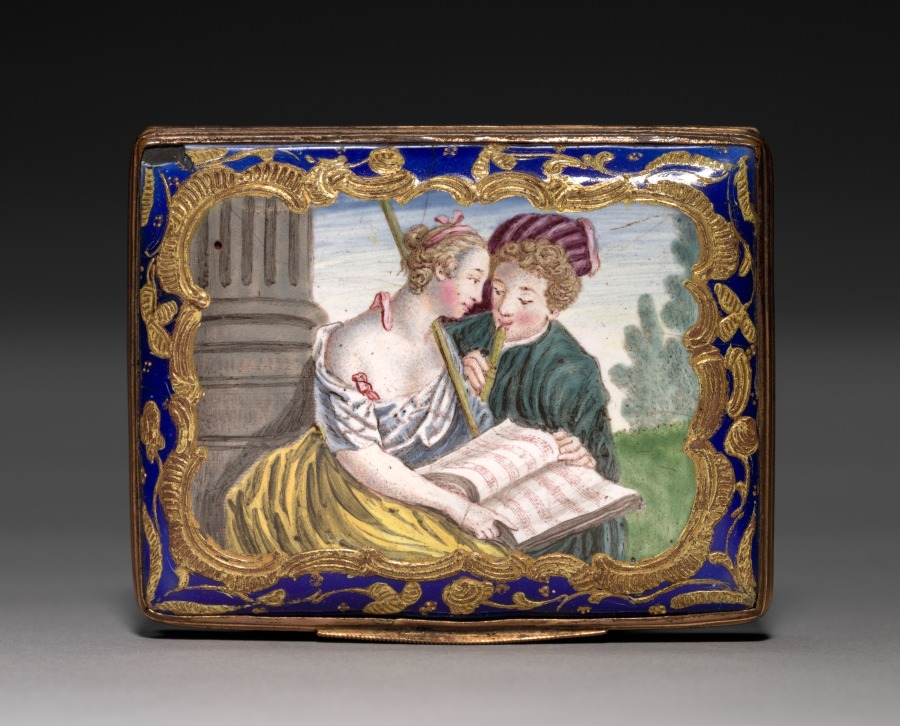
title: Snuff Box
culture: England, South Staffordshire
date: c. 1770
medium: enamel on copper, gilt metal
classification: Miscellaneous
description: Luxurious personal objects, like this snuff box, were an essential part of a privileged wardrobe during the 1700s and early 1800s, emphasizing their owner’s refinement and wealth. Their glittering surfaces, however, disguised a system based on the labor and suffering of enslaved or indentured people, whether in gold or stone mines, tobacco farms, or shops where these goods were made. Like cotton, sugar, and tea, snuff came from British colonies in America, India, and the Caribbean, where enslaved people were exploited to grow these crops under extremely harsh conditions. Slavery was not abolished in much of the British Empire until 1833. Britain and other European nations continued to pursue colonialism with a sense of superiority that found its way into all aspects of life, including decorative objects glorifying their conquests.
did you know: This small, elaborate box held snuff, a form of powdered tobacco that was inhaled in tiny amounts.